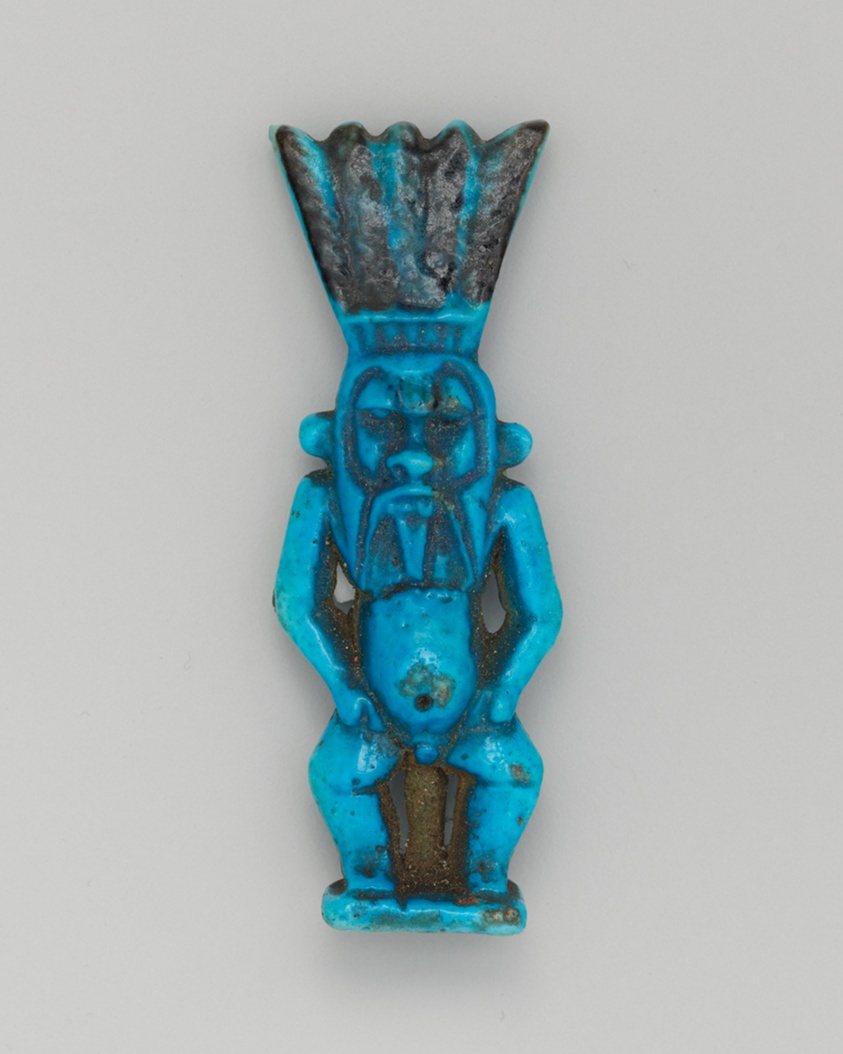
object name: Costume and Accessories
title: Amulet of Bes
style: late period (egyptian), ptolemaic, egyptian, ancient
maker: Egyptian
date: Late Period–Ptolemaic Period (664–30 BCE)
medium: Faience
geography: Egypt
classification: amulet; jewelry; ceramics; ancient art; costume; faïence (composite material)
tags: gods (deities)